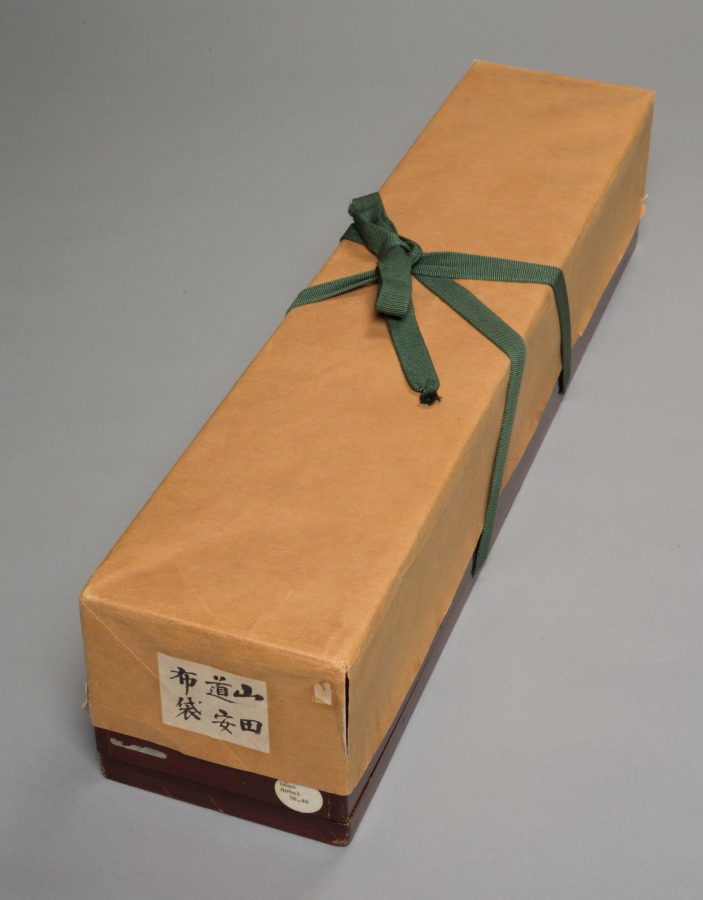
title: Hotei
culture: Japan, Muromachi period (1392–1573)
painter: Yamada Dōan I (Juntei) (Japanese, d. 1573)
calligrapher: Tōkei Jakurin (Japanese, dates unknown)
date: mid-1500s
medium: hanging scroll; ink on paper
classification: Painting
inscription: 桃渓道人 題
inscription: 大肚兮濶襟 寶聚嚢底沵 通霄別有路 勿向指尖尋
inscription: 落款 桃渓之印 若霖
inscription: 印章 山田氏道安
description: Hotei is a semilegendary figure who may have lived from the late 800s to the early 900s. He later became prominent in Chan (or Zen, in Japanese) Buddhist literature. He epitomizes the freewheeling figure outside the mainstream monastic system—in which people strive for enlightenment through prescribed methods—who nonetheless attains a high level of spiritual awakening. The inscription warns against seeking enlightenment by conscious effort: Big stomach, gaping garment, Treasures gathered deep in the bottom of his bag, Passing through the sky is another road, Do not seek that to which his fingertip points.